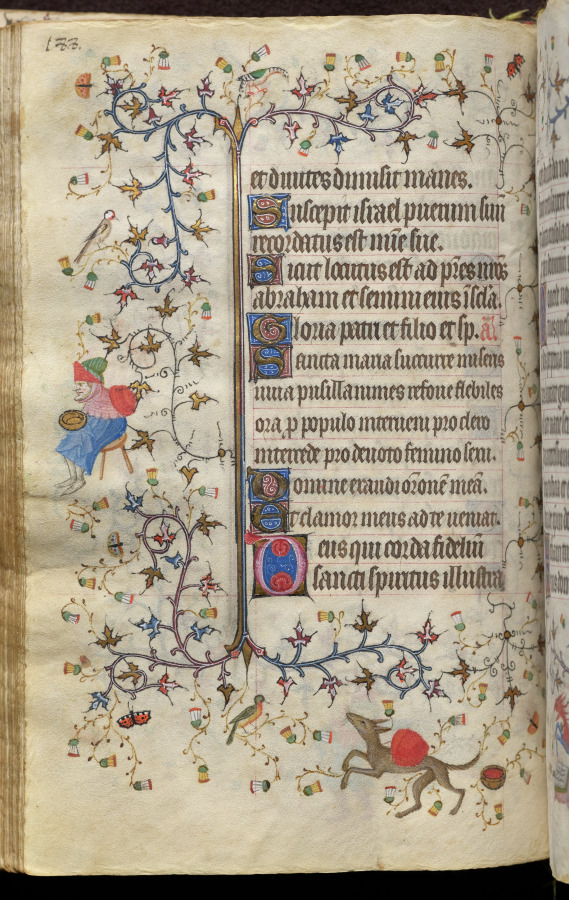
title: Hours of Charles the Noble, King of Navarre (1361-1425): fol. 94v, Text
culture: France, Paris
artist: Master of the Brussels Initials and Associates (French)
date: c. 1405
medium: ink, tempera, and gold on vellum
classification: Bound Volume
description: This precious volume was obviously highly prized by its owner, the French-born King of Navarre, who had his coat of arms painted on no less than twenty folios. Rather than directly commissioning this manuscript from a specific workshop, it seems that Charles the Noble acquired his book of hours -- perhaps ready-made for the luxury market -- while on a trip to Paris in 1404-05. A collaborative effort, six painting styles are evidenced within the pages of this codex, those of two Italians, two Frenchmen, and two Netherlanders. The painter who was responsible for the planning and decoration of the book, and who produced seventeen of the large miniatures, was a Bolognese artist known as the Master of the Brussels Initials. His principal assistant, responsible for most of the borders, was a Florentine who signed his name "Zecho" da Firenze on folio 208 verso.